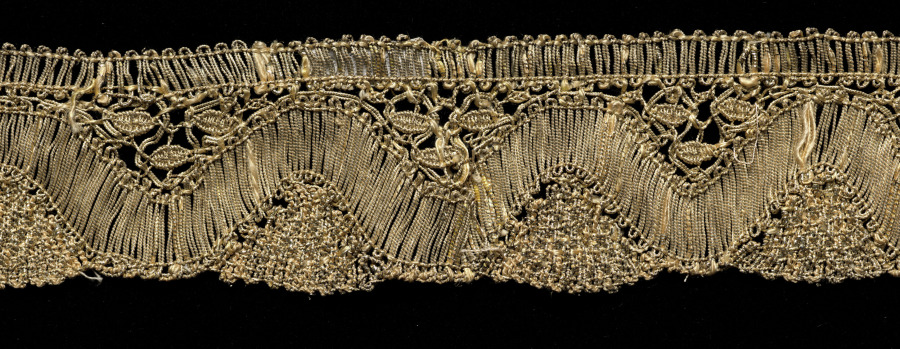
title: Bobbin Lace Edging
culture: Russia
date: 1800s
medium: lace, bobbin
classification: Lace